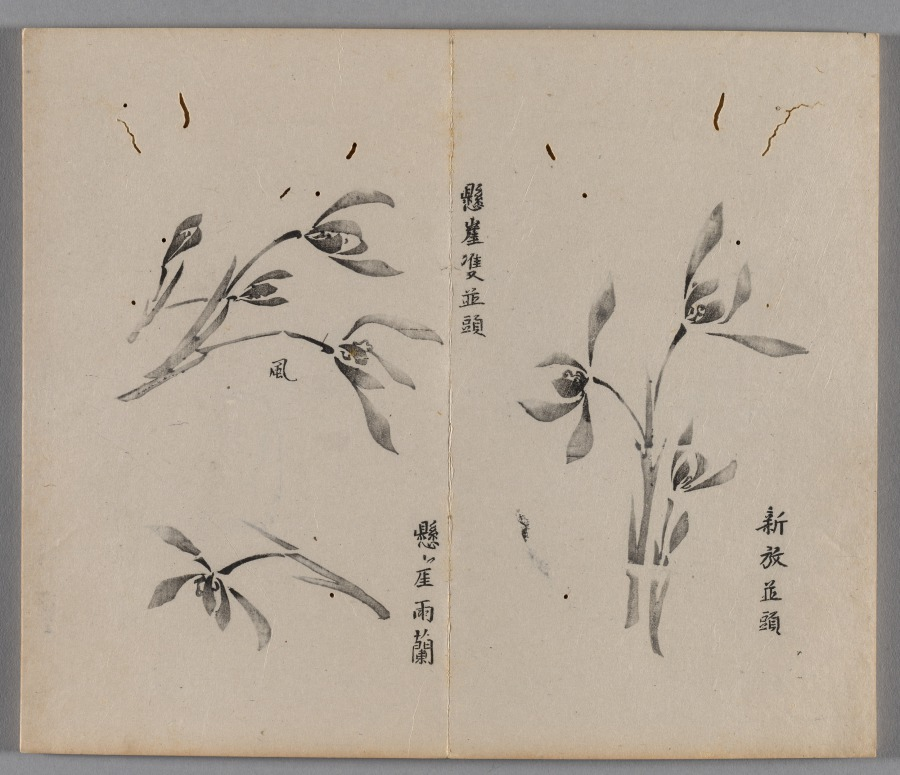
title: Ten Bamboo Studio Painting and Calligraphy Handbook (Shizhuzhai shuhua pu): Orchids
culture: China, Qing dynasty (1644-1911)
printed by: Hu Zhengyan (Chinese, c. 1584–1674)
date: 1633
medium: Woodblock-printed book; ink and colors on paper; first edition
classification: Print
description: Color printing reached a level of perfection in the early 1600s, as seen in this Ten Bamboo Studio Collection of Calligraphy and Painting and the Mustard Seed Garden Manual of Painting (printed 1679 and 1701). The painterly quality, precision in registering (aligning) the woodblocks, and harmonious colors made them the most successful color print editions in Chinese history. Both editions were printed and compiled in Nanjing, spread nationwide, and had a great impact on the arts in Japan and Korea.